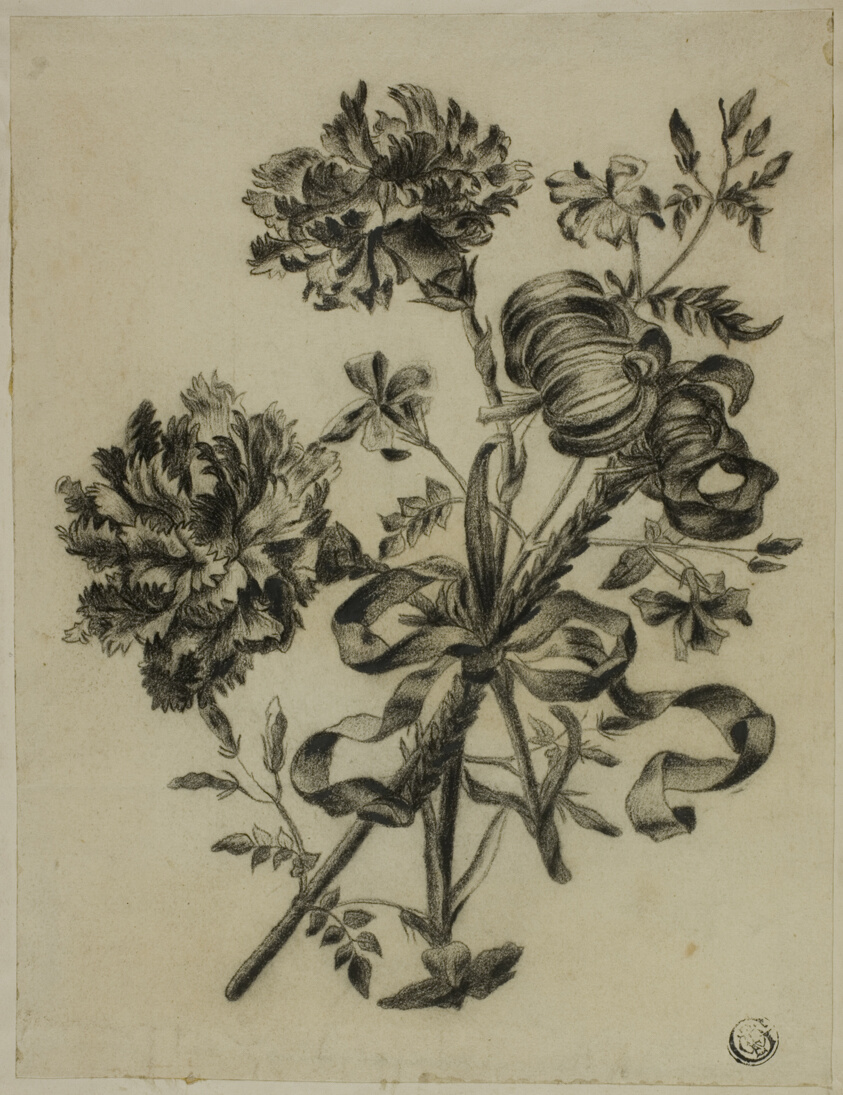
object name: Drawing and Watercolor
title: Bouquet of Carnations and Lilies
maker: Unknown Artist; European, 18/19th century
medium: Black crayon, with charcoal, on cream wove paper, laid down on cream wove paper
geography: Europe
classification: crayon; drawings (visual works); prints and drawing